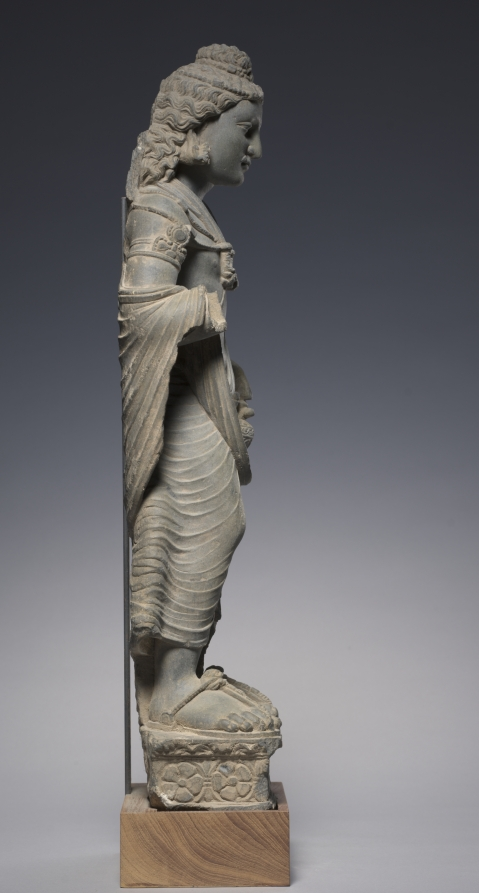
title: Maitreya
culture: Pakistan, Gandhara, Kushan period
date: c. 200s CE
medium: gray schist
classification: Sculpture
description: The water bottle in his left hand indicates that this figure depicts the bodhisattva Maitreya. It is thought that Maitreya will reach enlightenment after the teachings of the Buddha have been forgotten, in order to spread the teachings again.